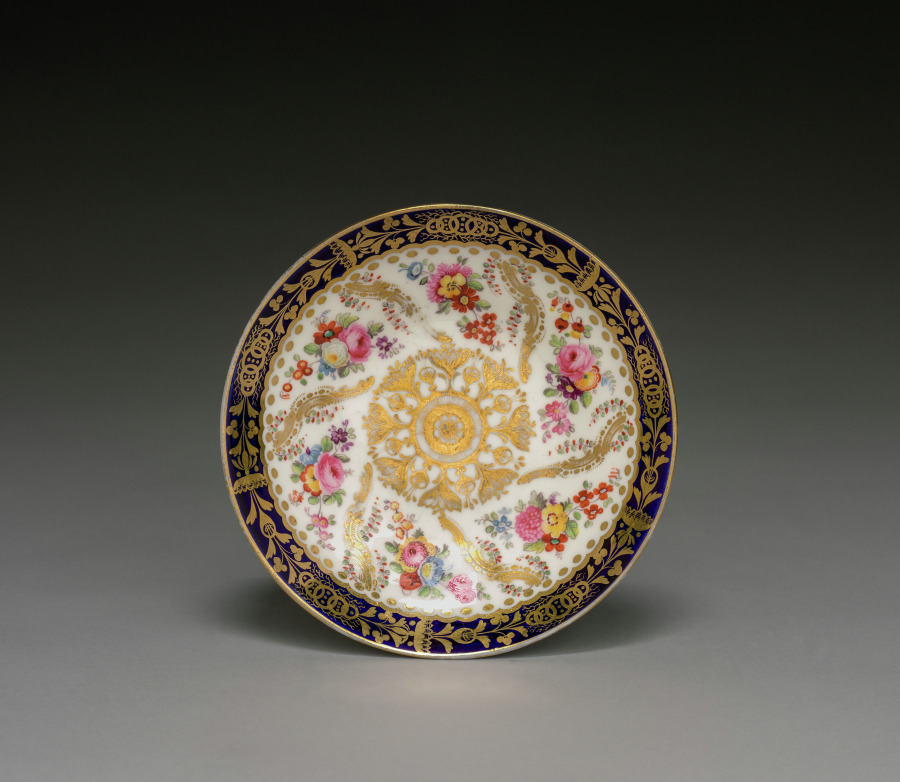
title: Saucer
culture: England, Staffordshire, late 18th century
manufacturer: Spode Factory (British)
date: late 1700s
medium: porcelain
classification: Ceramic